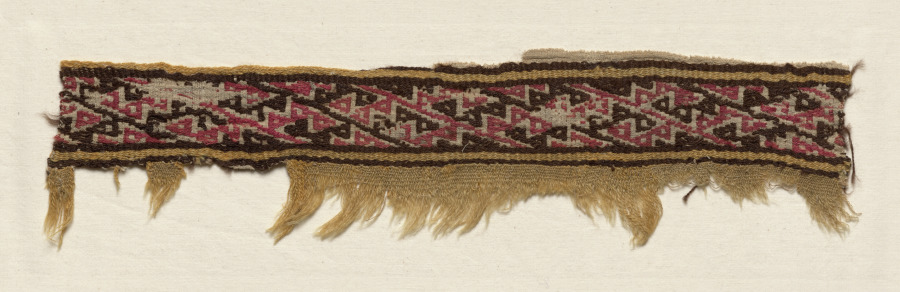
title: Four Border Strips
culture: Peru, Central Coast, Chancay, 12th-15th century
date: c. 1100–1400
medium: plain compound cloth; cotton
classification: Textile